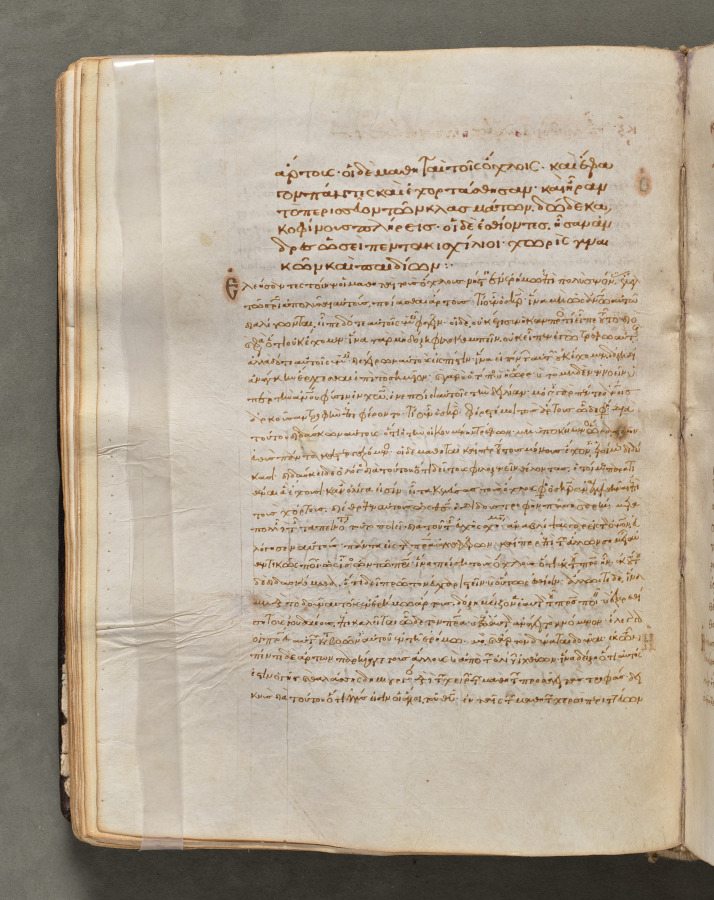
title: Text, folio 65 (verso), from a Gospel Book with Commentaries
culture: Byzantium, Constantinople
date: c. 1000–1100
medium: ink, tempera, and gold on vellum; leather binding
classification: Bound Volume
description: Each of the four gospels in this book opens on a page with brilliantly illuminated borders depicting the author of the text as well as birds-principally peacocks, symbols of the immortality of the soul-and fountains, representing the fountain of life and the salvation of the soul. This volume consists of 428 leaves with texts in Greek. Its level of sophistication suggests that it was probably written and decorated in a monastery in Constantinople.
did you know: Gospel Books were carried in procession through Byzantine churches.